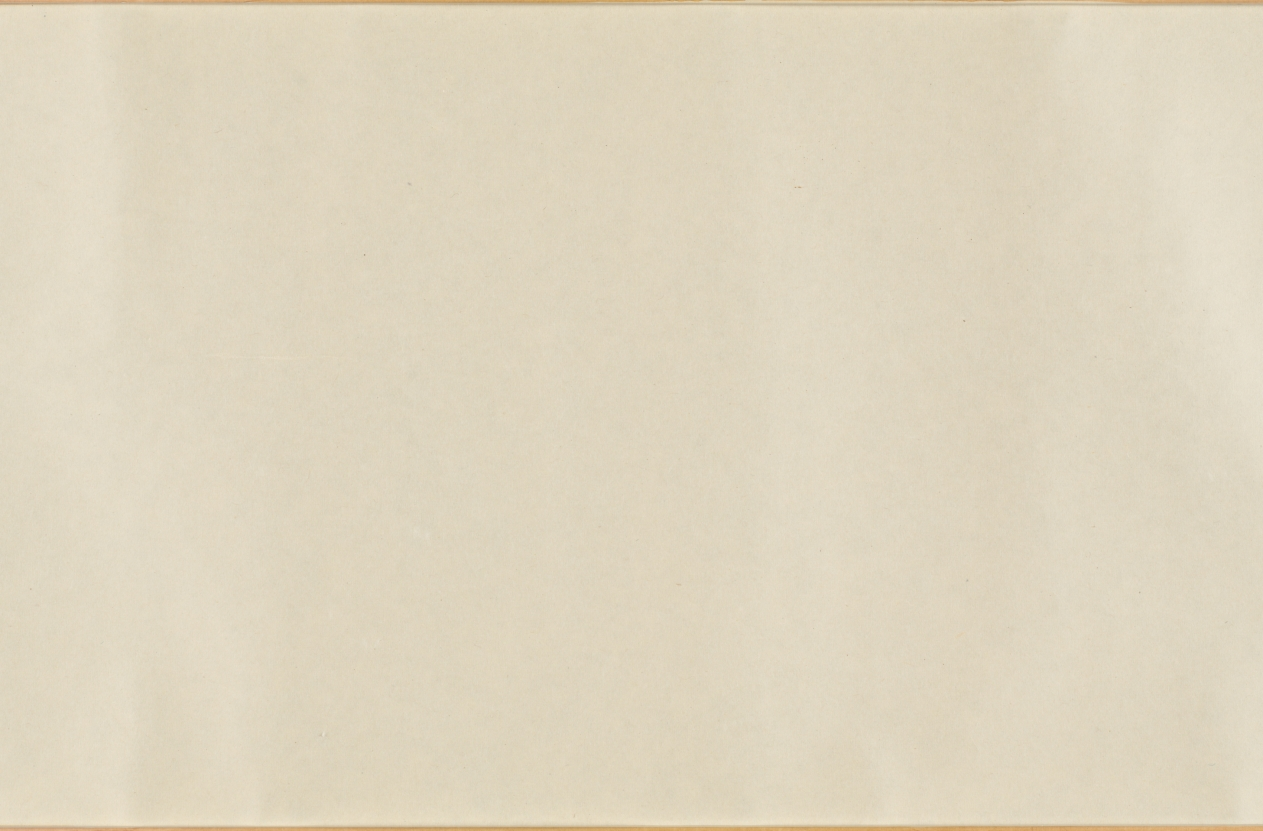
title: Selections from the New Collection of Japanese Poems from Ancient and Modern Times (Shinkokin wakashū) with Printed Designs of Chinese Lions and Crab Finger Grass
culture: Japan, Edo period (1615–1868)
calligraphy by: Hon'ami Kōetsu (Japanese, 1558–1637)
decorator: Tawaraya Sōtatsu (Japanese, c. 1570–c. 1640)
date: early 1600s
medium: handscroll; ink, gold, and silver on paper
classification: Calligraphy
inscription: Seal: 光悦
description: Hon’ami Kōetsu was a calligrapher and craftsman who frequently collaborated with the painter Tawaraya Sōtatsu, considered the first master of the Rinpa school. Kōetsu brushed seven poems from the autumn section of a poetry anthology onto dyed paper with motifs designed and printed in gold and silver by Sōtatsu.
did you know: Before becoming a master painter of screens, Tawaraya Sōtatsu painted fans.